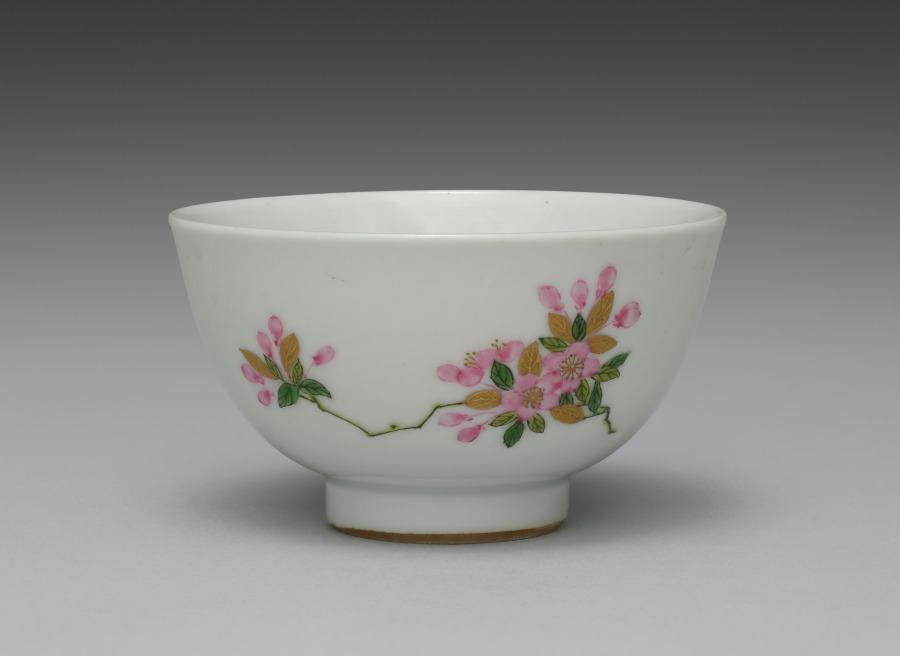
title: Teabowl from Teabowls with Peony and Crabapple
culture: Japan, Meiji period (1868–1912)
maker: Seifū Yohei III (Japanese, 1851–1914)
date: 1893–1914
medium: One from a set of five teabowls; porcelain with underglaze and overglaze color enamels and gold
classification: Ceramic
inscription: 清風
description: Overglaze color enamels are generally called iro-e (literally “color picture”) in the terminology customarily used for porcelain decoration of the Edo period. This set of teabowls is a fine example of Yohei III’s skilled use of the technique, which is identified on this set’s box lid with the alternate phrasing “porcelain with color painting” (jisaiga). Distinct from the way overglaze colors were used in Kakiemon ware from Arita, his designs and applications show a consciousness of porcelain decoration of the Qing dynasty. Here, he combines Chinese models with a sensibility taken from Kyoto ware precedents, including painting with powdered gold (kinrande). The colors used in the bowls are as follows: blue, black, gold, white, light green, green, and pink. The blue appears only inside the footring, as a double band of underglaze color. The black iron, used for stems and leaf veins, is painted over the glaze. The gold, also painted over the glaze, is used for leaves and the centers of flowers, for solid, glossy lines defining detail, or as a semimatte ground. The white of the peony flower is built up to a low relief over the glaze. Yohei has incised lines of varying widths into the pigment, carving away to the bowl’s surface, to differentiate individual petals and their rippled shapes. The light and dark greens, as well as the pink, are painted over the glaze. Of note is how Yohei has first used thinly applied lines of light green to draw the plum branch before applying the opaque iron black. For the plum buds and flowers, he has used a diluted pink with an opaque pink for outline, both over the glaze. In his later works, Yohei used pink both over and under the glaze in a manner similar to underglaze blue, and it can be challenging in some cases to discern which technique he has used. A lidded container in a private collection has a similar design but is augmented with the inclusion of white and purple magnolia blossoms. In contemplating the original decorative program of a set, of which these teabowls may have been a part, it is worth considering that perhaps not all objects included the full range of motifs. In such cases, the composition of the individual object may be best understood within the context of the extended ensemble. Here, the delicate pink plum on one side of the bowl seems slightly unbalanced with the bold white peony on the other, but when seen with other objects with the magnolia and its additional colors and shapes, it is possible to imagine a set with a complex, balanced design across multiple pieces.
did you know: "Seifū" is inscribed on the base in a double band of underglaze color.